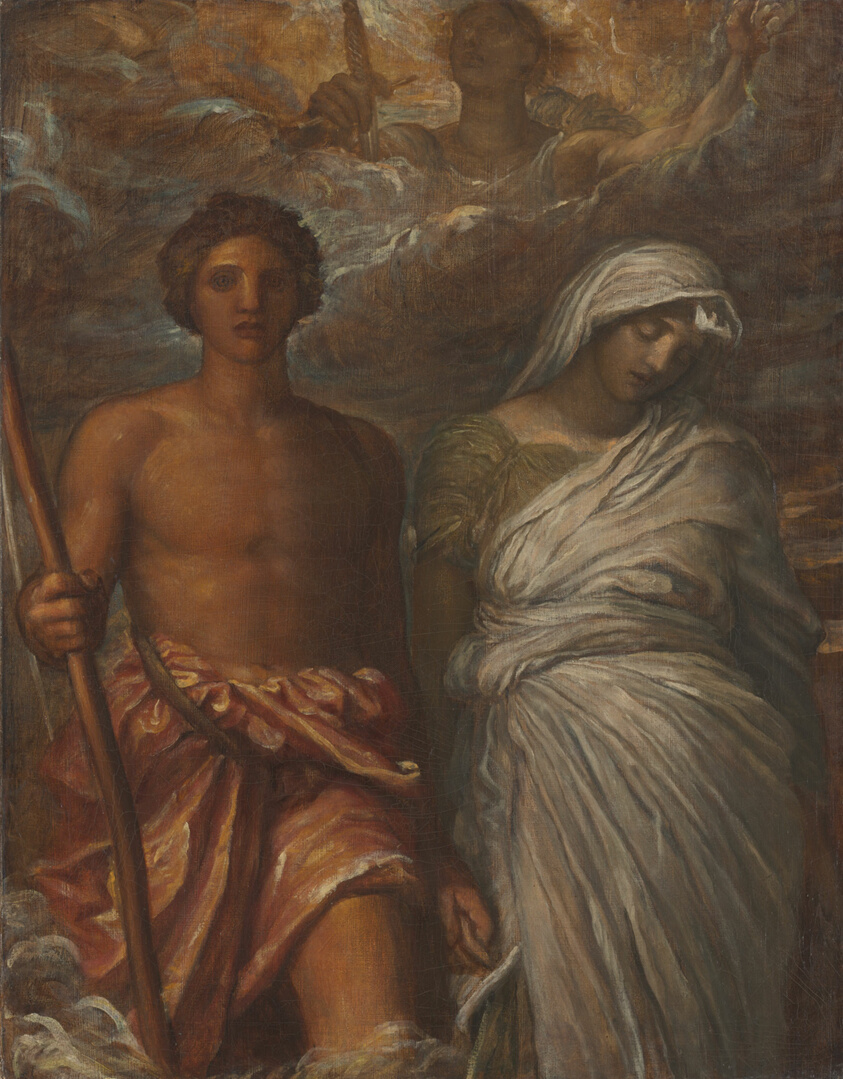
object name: Painting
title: Time, Death and Judgment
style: nineteenth century, 19th century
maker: George Frederick Watts (English, 1817–1904)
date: 1866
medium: Oil on canvas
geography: England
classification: oil on canvas; paint; oil paintings (visual works); british; painting; european painting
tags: time, death, men, woman, clouds, sky, weapons, swords